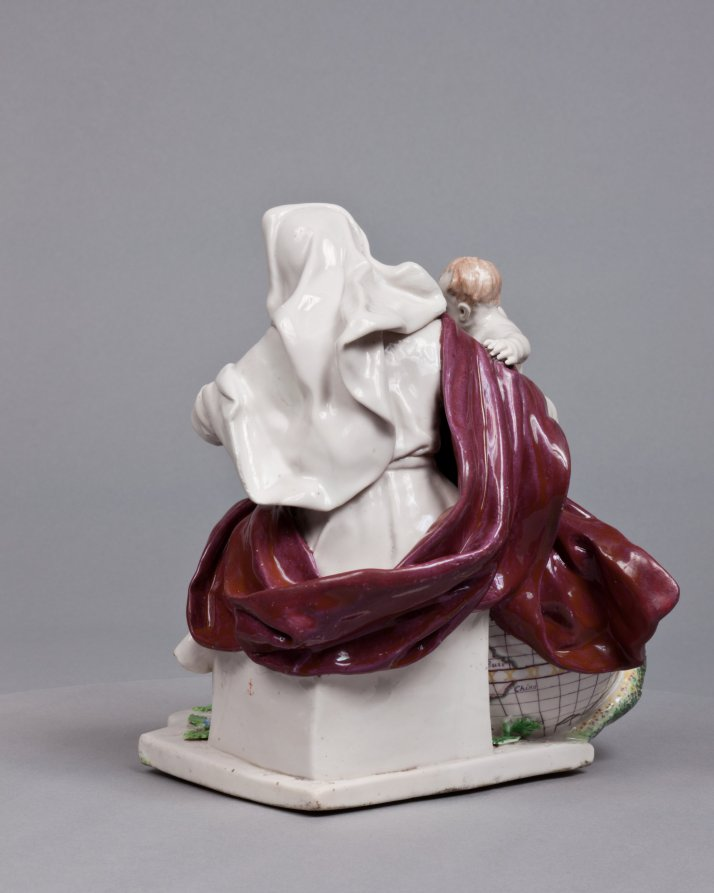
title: Madonna and Child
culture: England, Chelsea, 18th century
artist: Chelsea Porcelain Factory (Britain, London, 1745–84)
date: c. 1755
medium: porcelain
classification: Ceramic